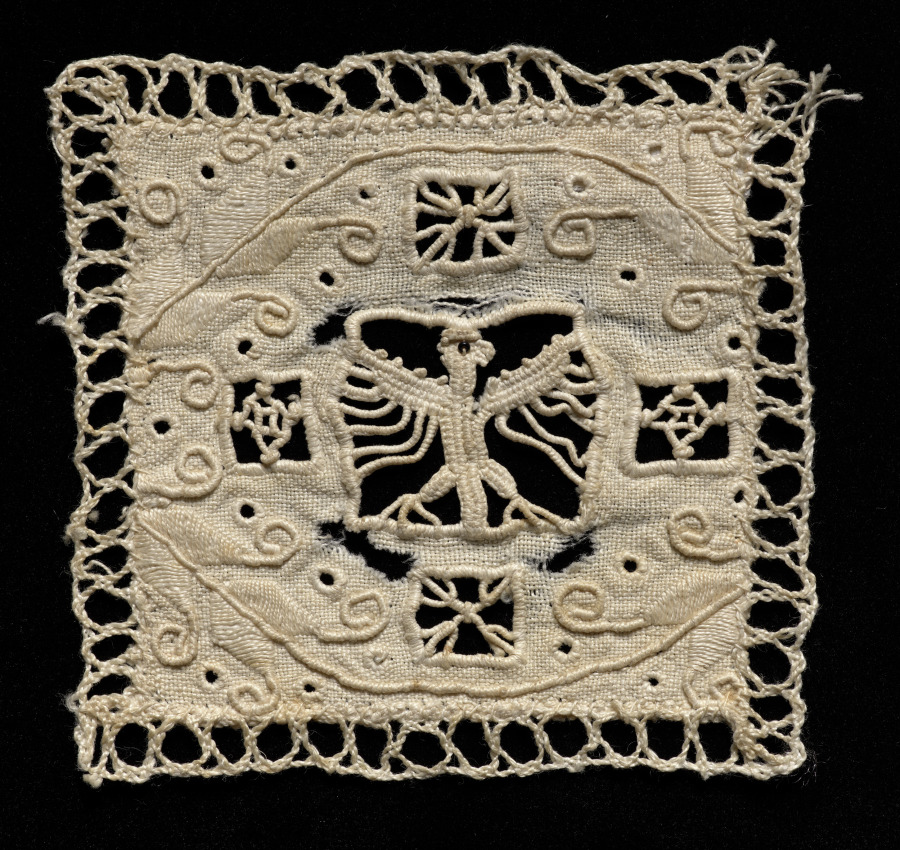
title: Lace Fragment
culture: Italy, 1600s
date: 1600s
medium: lace, needlepoint: linen of Needlepoint (Cutwork) Lace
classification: Lace